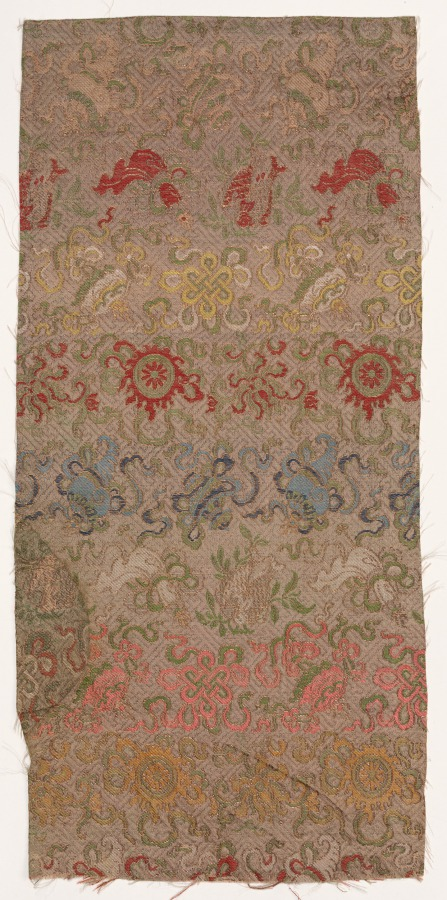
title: Fragment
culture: China, 19th century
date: 1800s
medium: silk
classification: Textile